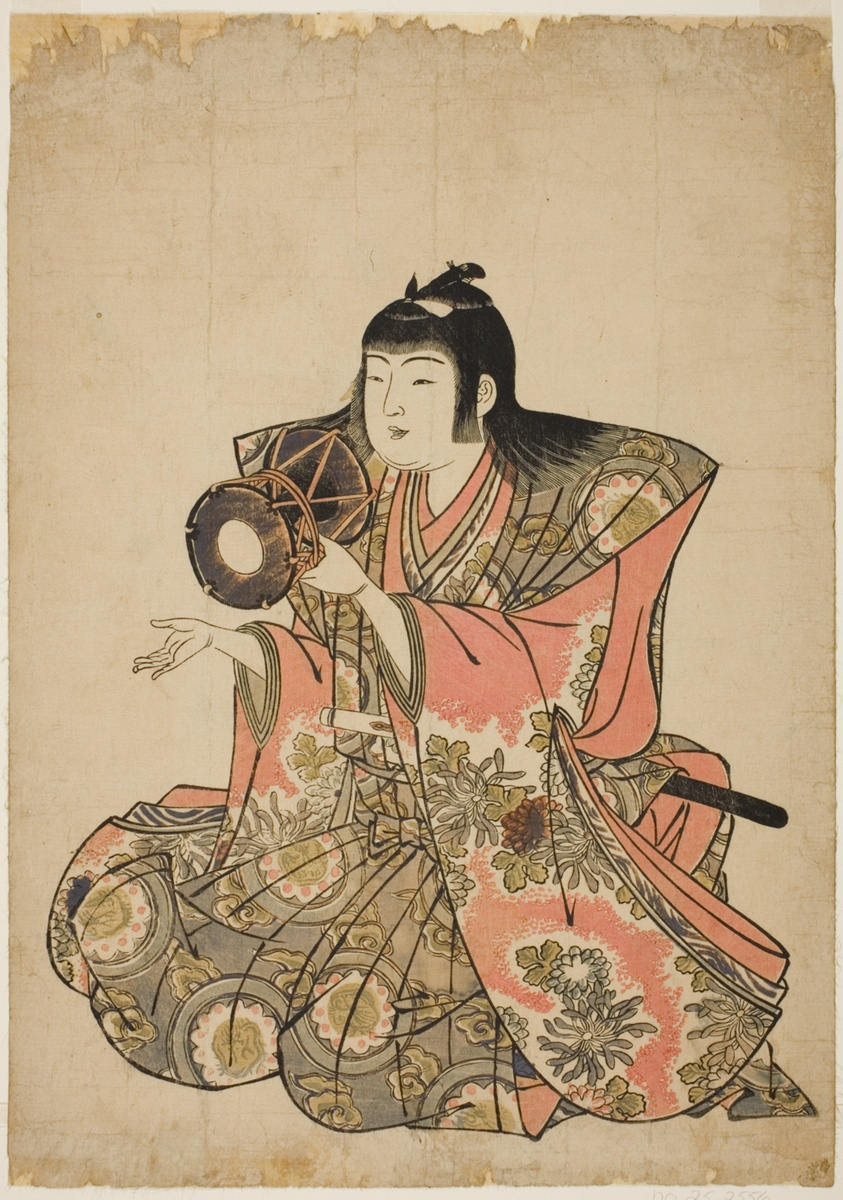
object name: Print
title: The Hand-Drum Player, from an untitled series of five musicians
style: Japanese (culture or style)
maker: Attributed to Kitao Shigemasa; Japanese, 1739-1820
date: 1780s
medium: Color woodblock print; oban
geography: Japan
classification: woodblock print; print; asian art